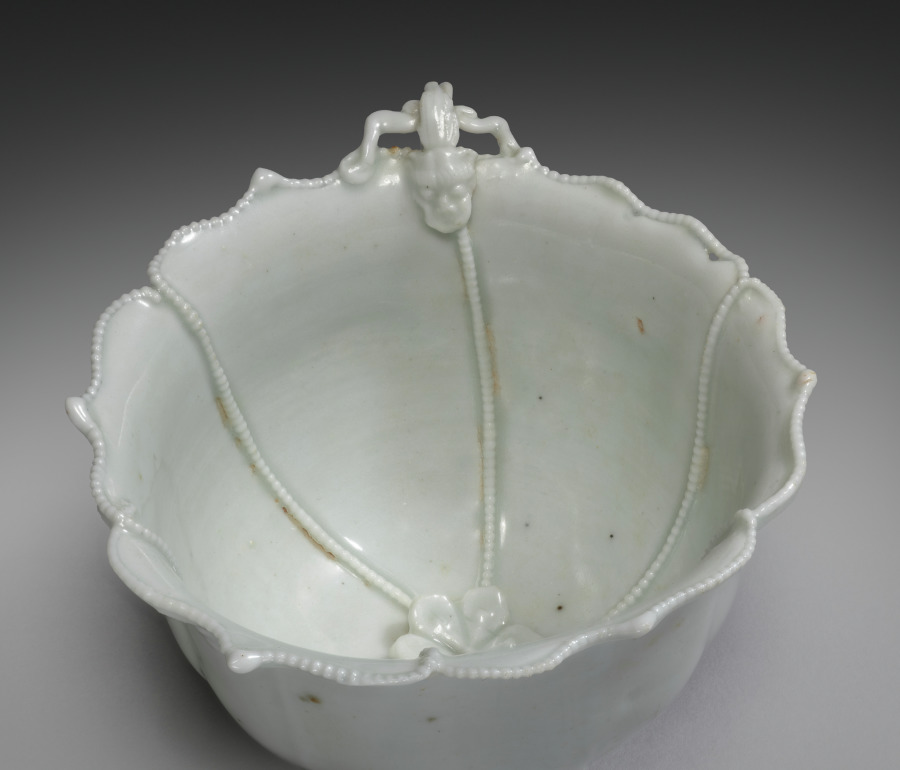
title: Fluted Cup with Dragon Handle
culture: China, Jiangxi Province, Jingdezhen kilns, Yuan dynasty (1271–1368)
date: early 1300s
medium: Glazed porcelain, Qingbai (bluish-white) ware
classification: Ceramic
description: Very thinly potted, the subtly lobed body of this cup is almost translucent. The thin, slightly opaque, light greenish glaze lends a sugary shine. Applied elements, including the handle, beaded borders, and sculptural floret, are constructed and glazed with the same materials as the body, providing a seamless blend of form and decorative embellishment. The result is an evocative reminder of slightly earlier silver cups, also created in the form of flowers. This pristine, natural construction is challenged, however, by the archaic dragon that acts as the handle. Borrowed from the decoration found on much earlier bronzes, this added form illustrates the eclecticism of the Yuan, the attempt to blend present vision with interest in the past.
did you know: Clay beading divides the cup's interior into six foliate panels with a six-petaled flower at the junction of the beaded lines.